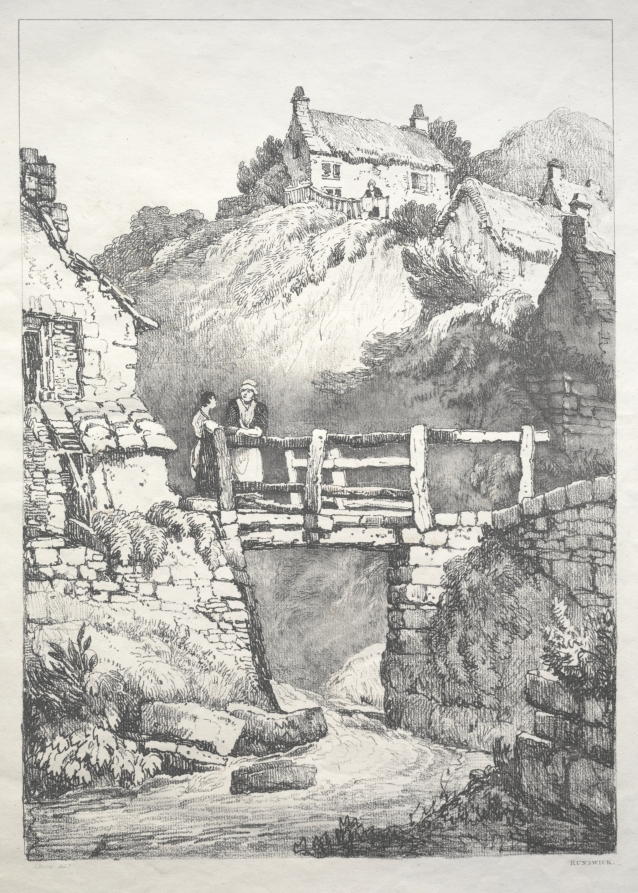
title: A Series of Ancient Buildings and Rural Cottages in the North of England: Runswick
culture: England, 19th century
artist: Samuel Prout (British, 1783–1852)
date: 1821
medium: softground etching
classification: Print